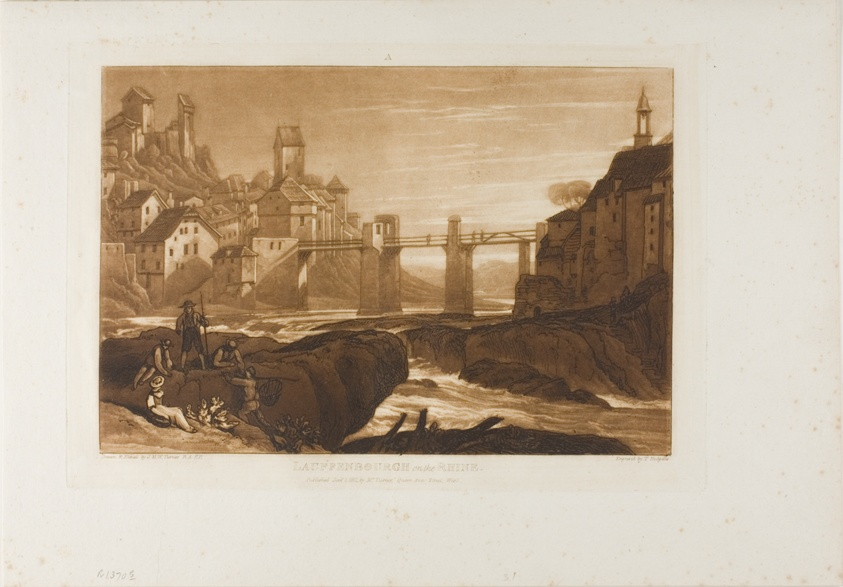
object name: Print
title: Lauffenbourgh on the Rhine, plate 31 from Liber Studiorum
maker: Joseph Mallord William Turner (English, 1775-1851); Engraved by T. Hodgetts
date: published January 1, 1811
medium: Etching and engraving on ivory paper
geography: England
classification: etching; print; prints and drawing